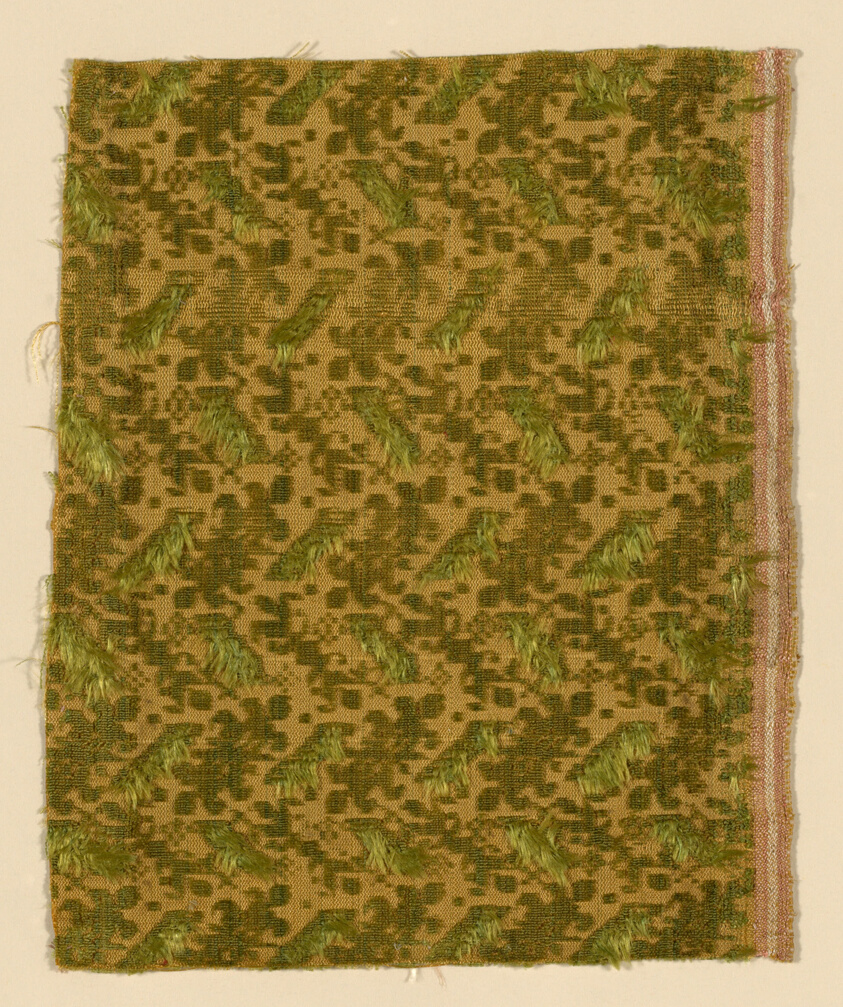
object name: Textile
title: Fragment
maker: Italy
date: 17th century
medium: cisele voided twill velvet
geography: Italy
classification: textile; weaving - velvet